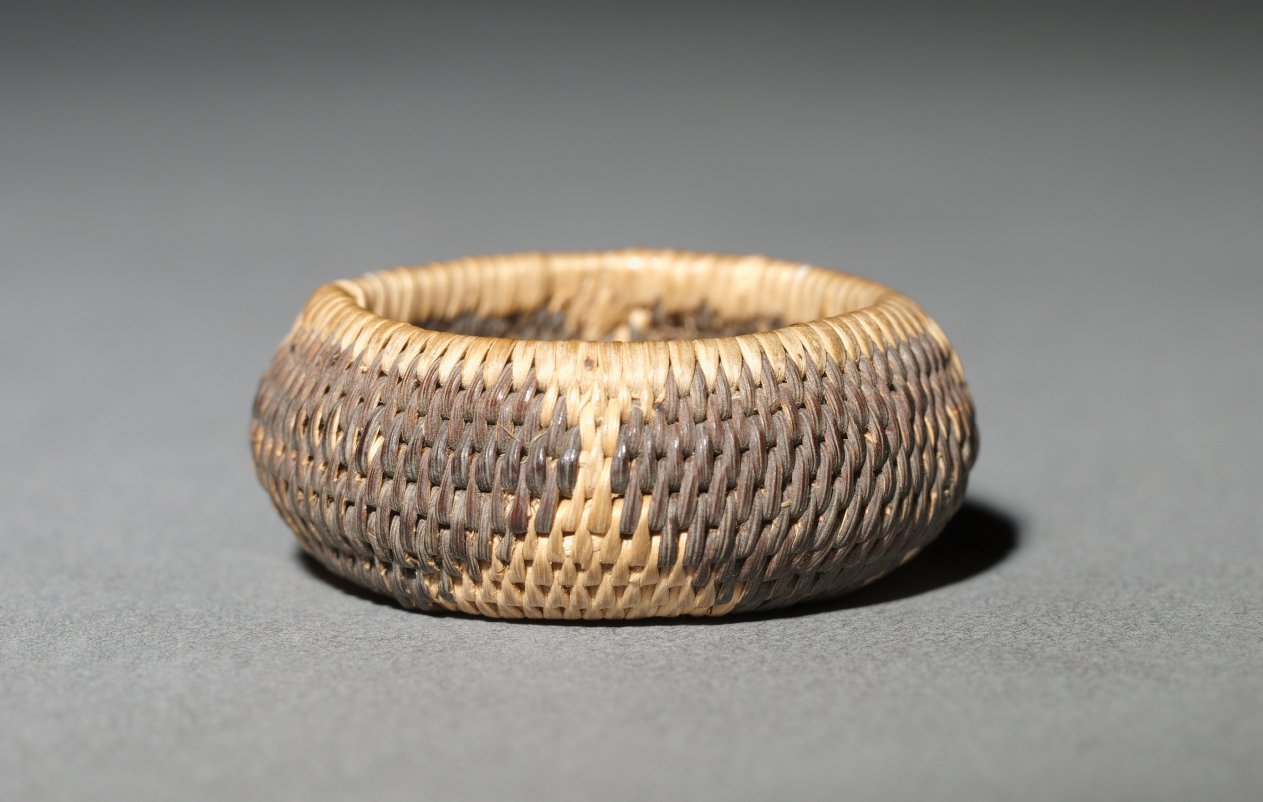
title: Miniature Basket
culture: America, Native North American, Southwest, Arizona, Akimel O'odham (Pima), Unassigned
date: before 1923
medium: plant fiber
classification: Basketry